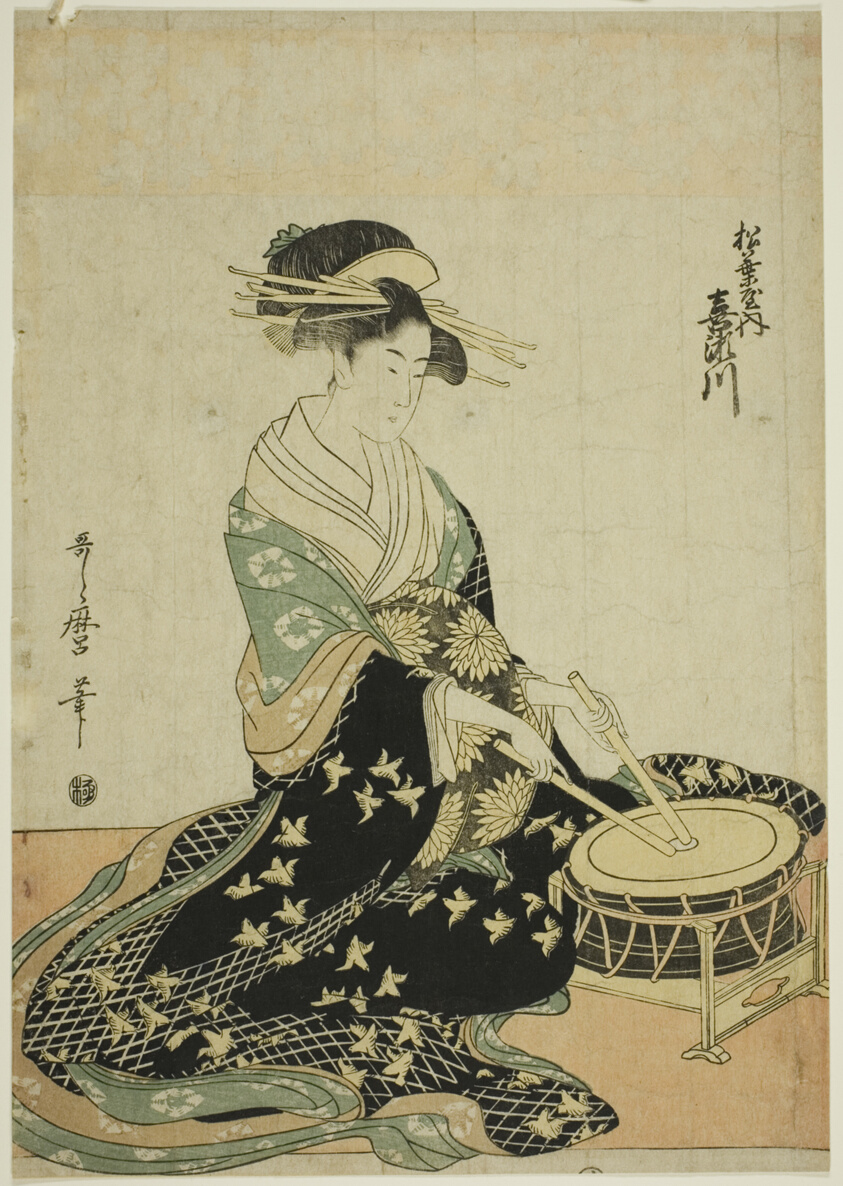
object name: Print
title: The Courtesan Kisegawa of the Matsubaya, from an untitled series of courtesans of the Matsubaya as five musicians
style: Japanese (culture or style)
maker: Kitagawa Utamaro 喜多川 歌麿; Japanese, 1753 (?)-1806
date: c. 1797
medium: Color woodblock print; oban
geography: Japan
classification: print; asian art